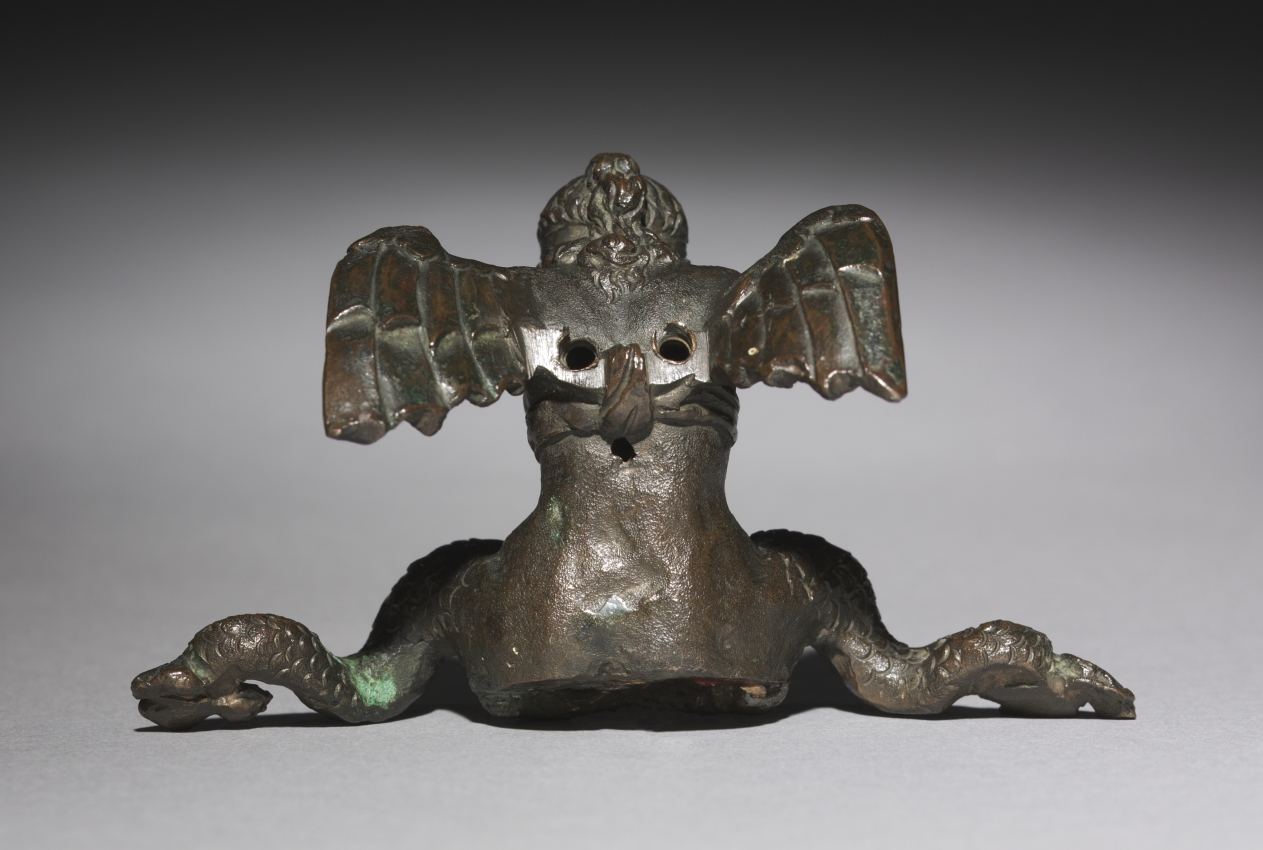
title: Doorpull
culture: Italy, 16th century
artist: Leone Leoni (Italian, 1509–1590)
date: 16th century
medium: bronze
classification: Sculpture